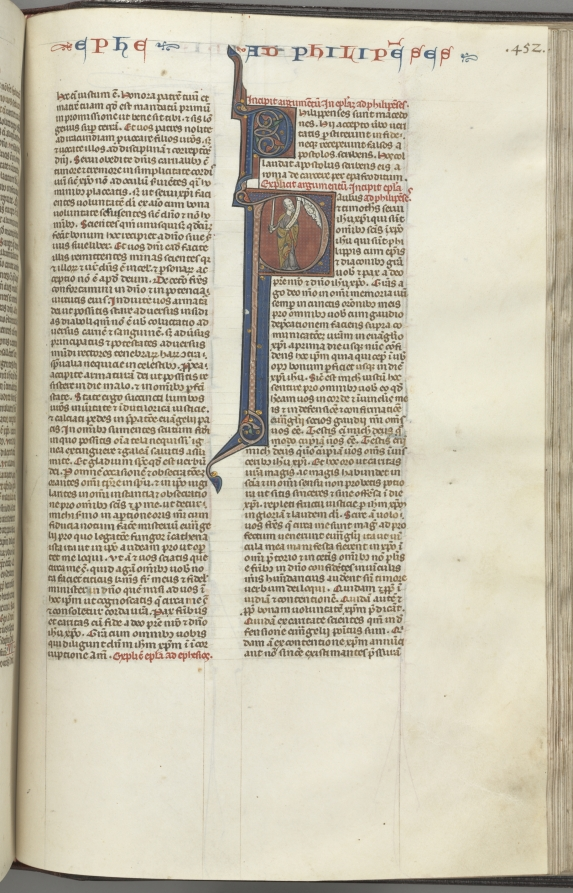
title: Fol. 452r, Philippians, historiated initial P, Paul standing with a sword and a scroll, talking to the bust of God above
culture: Southern France, Toulouse(?), 13th century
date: c. 1275–1300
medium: ink, tempera and gold on vellum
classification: Bound Volume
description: Biblical manuscripts were highly prized and important possessions of churches, monasteries, cathedral schools, and universities throughout medieval Europe. The biblical texts were known as the vulgate, the translations made by Saint Jerome in the fourth century from Hebrew and Greek into Latin, which became the definitive and official Latin version of the Roman Church. In the 13th century, the bible was, for the first time, produced as a single volume with an officially sanctioned sequence to its books and chapters as illustrated by this example. The very extensive decoration of this bible is arranged hierarchically to indicate the relative importance of the various texts so that full or almost full-page initials mark the openings of the first prologue, Genesis, and the first Gospel; historiated initials mark the beginning of each book and illuminated initials mark the Prologues.